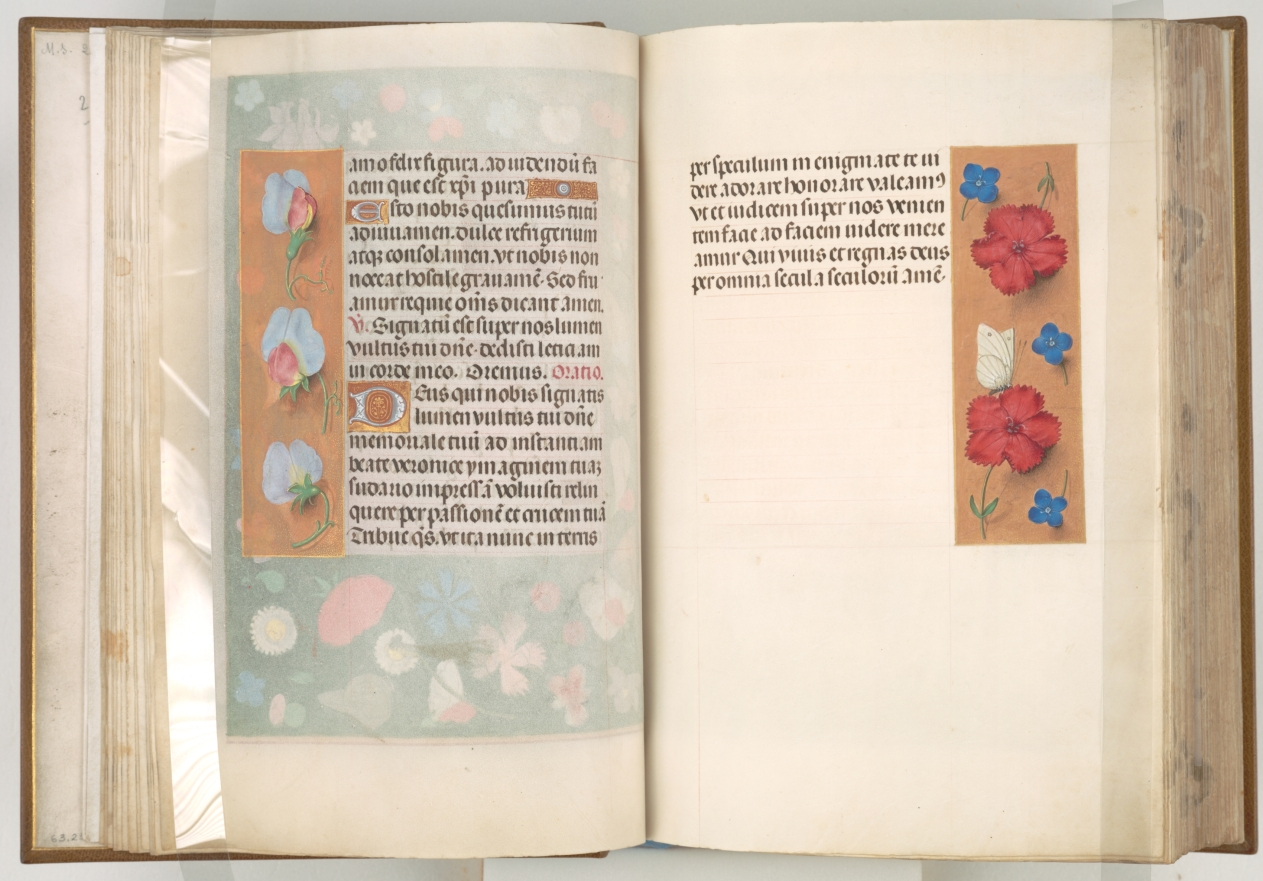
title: Hours of Queen Isabella the Catholic, Queen of Spain: Fol. 15v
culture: Flanders, Ghent and Bruges, late 15th century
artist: Master of the First Prayerbook of Maximillian (Flemish, c. 1444–1519)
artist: and Associates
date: c. 1500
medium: ink, tempera, and gold on vellum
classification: Bound Volume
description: This manuscript was illuminated by a circle of at least five highly organized manuscript painters active in the Flemish cities of Ghent and Bruges. The principal illuminator was Alexander Bening, who painted the majority of the book's miniatures. Manuscripts produced by this circle of artists are renowned for the decoration of their borders, which typically feature a rich variety of realistically-painted flowers, birds, and butterflies. This prayer book, called a book of hours, was intended not for a cleric, but for the private devotions of a lay person-in this case, Isabella the Catholic, Queen of Spain (1451-1504). Isabella's coat of arms embellishes the book's frontispiece. It is unlikely that the book was commissioned by the Queen herself; rather, she probably received it as a diplomatic gift from someone courting her patronage, perhaps Cardinal Francisco Jimenez de Cisneros. A Franciscan friar, Jimenez was dependent upon Isabella for his advancement, first to the post of Queen's confessor in 1492, and then to Archbishop of Toledo in 1495.